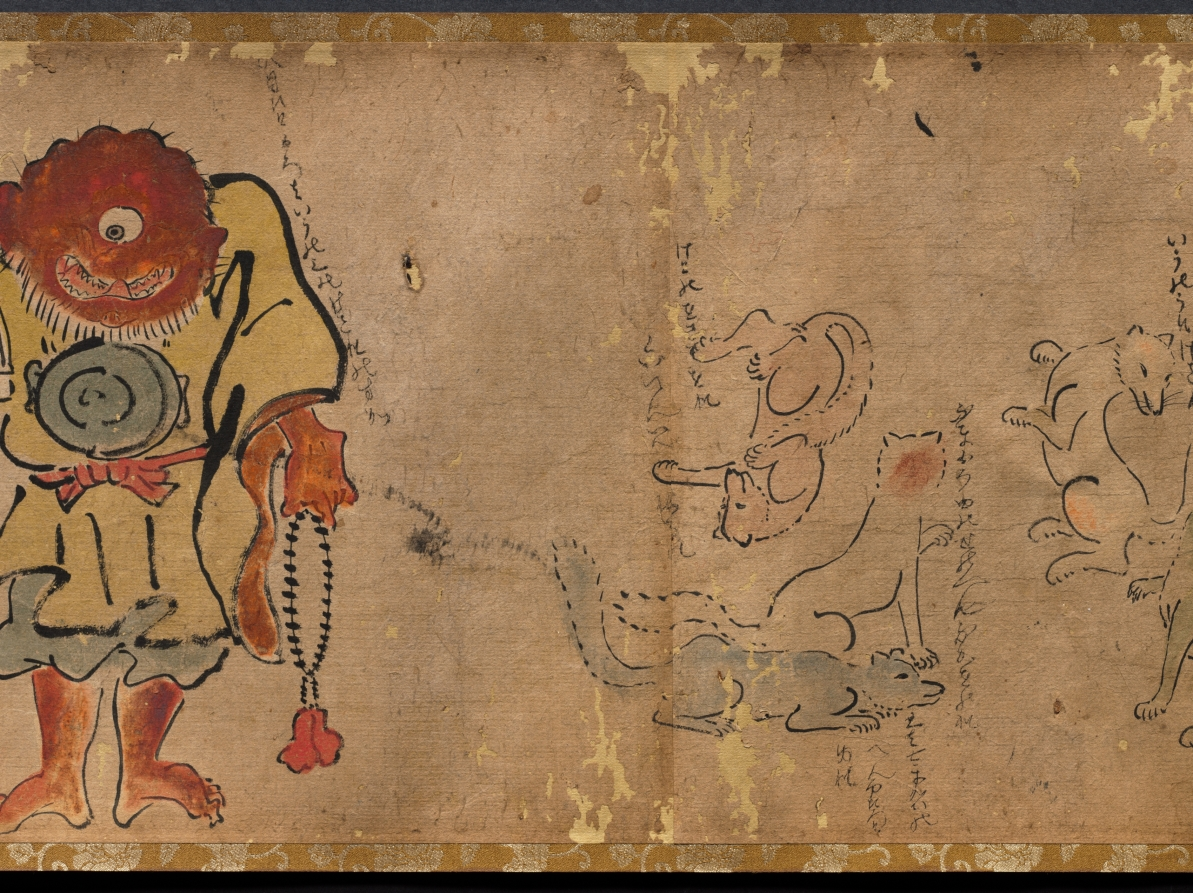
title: The Illustrated Tale of Oishi Hyōroku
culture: Japan, Edo period (1615–1868)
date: 1700s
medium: handscroll; ink and color on paper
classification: Painting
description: This incomplete handscroll illustrates part of the story of Oishi Hyoroku, a young man tasked with battling fox apparitions who were creating problems in his town. In other extant versions of the scroll, the story is set in the fall of 1624 in Kagoshima in southern Japan. Throughout the story, Hyoroku is tricked and terrified by the foxes that shift their shapes into a variety of monstrous phantoms. After repeated humiliations, he eventually captures two of the foxes. In this version, colloquial texts that function like text blurbs in comics appear throughout the scroll, but the main text is missing.